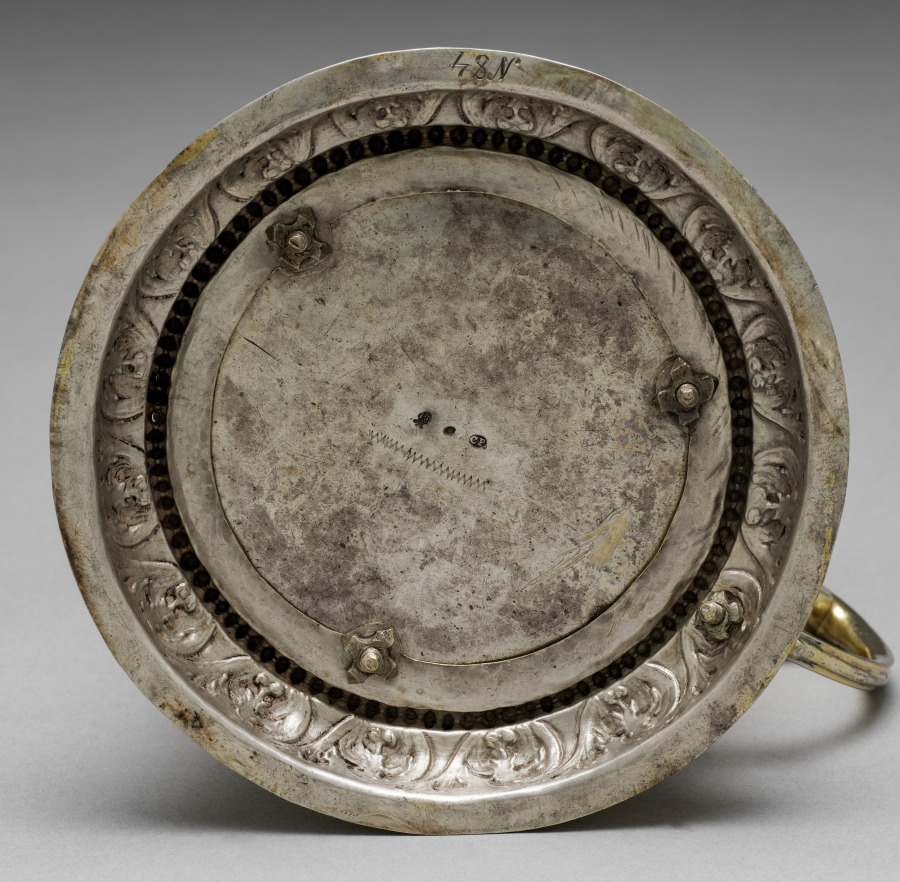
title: Tankard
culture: Germany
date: 1600s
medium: silver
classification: Silver